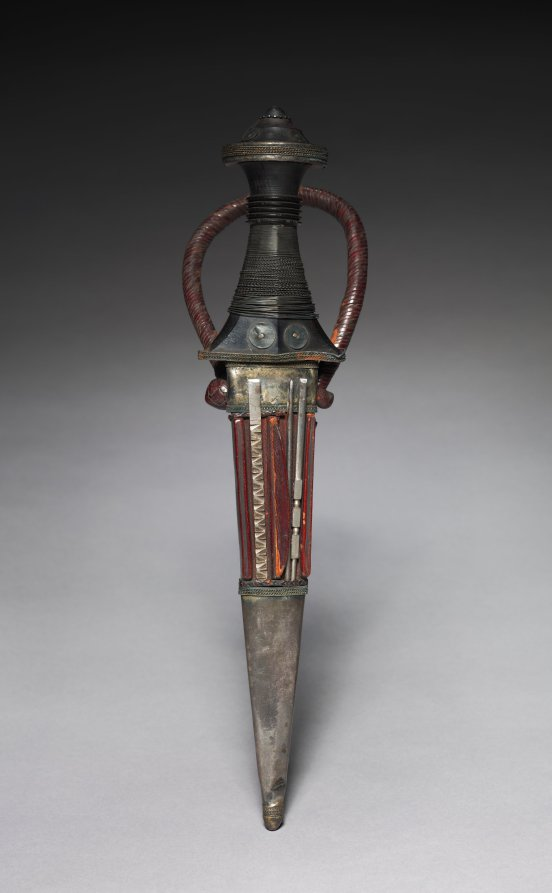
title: Dagger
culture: Africa, East Africa, Sudan, unknown maker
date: 1880–1910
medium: metal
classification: Arms and Armor